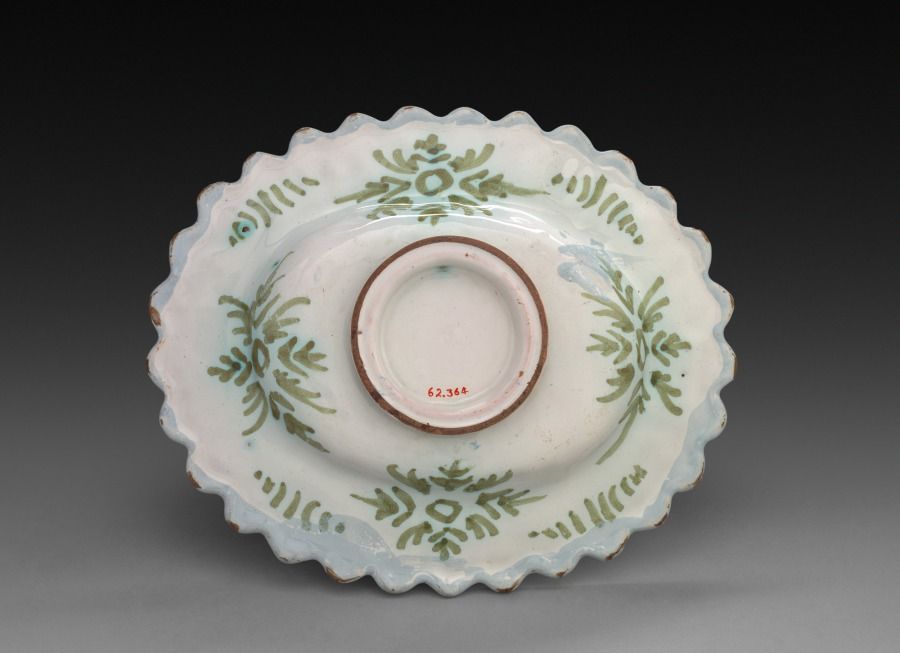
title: Platter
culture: France, 17th century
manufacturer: Nevers Factory (French)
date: c. 1650–1680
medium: faience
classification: Ceramic